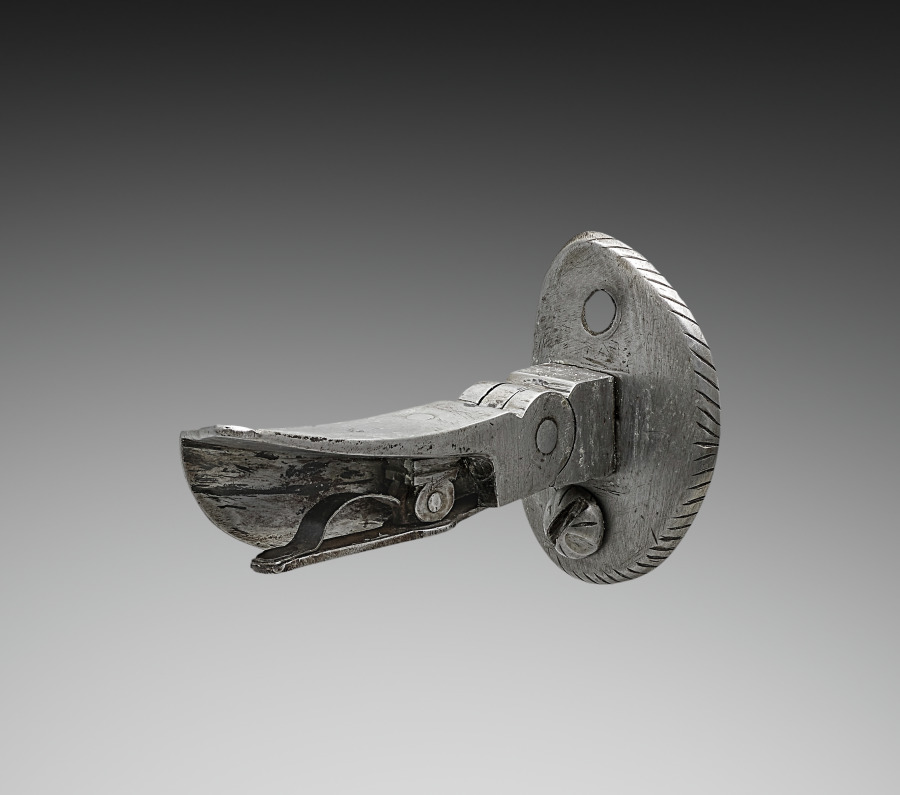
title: Lance Rest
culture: Germany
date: c.1550–1570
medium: iron, steel, leather and brass rivets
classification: Arms and Armor